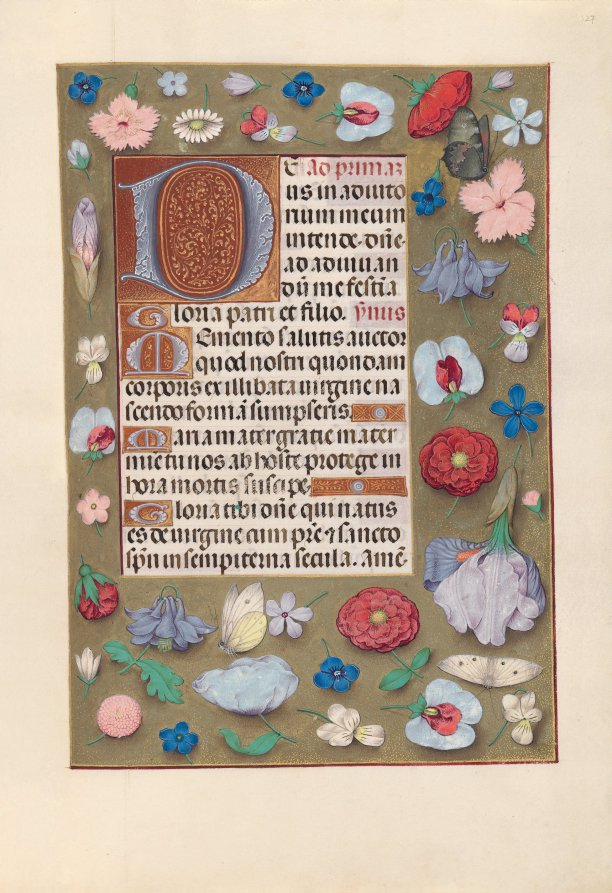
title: Hours of Queen Isabella the Catholic, Queen of Spain: Fol. 127r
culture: Flanders, Ghent and Bruges, late 15th century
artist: Master of the First Prayerbook of Maximillian (Flemish, c. 1444–1519)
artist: and Associates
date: c. 1500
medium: ink, tempera, and gold on vellum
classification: Bound Volume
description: This manuscript was illuminated by a circle of at least five highly organized manuscript painters active in the Flemish cities of Ghent and Bruges. The principal illuminator was Alexander Bening, who painted the majority of the book's miniatures. Manuscripts produced by this circle of artists are renowned for the decoration of their borders, which typically feature a rich variety of realistically-painted flowers, birds, and butterflies. This prayer book, called a book of hours, was intended not for a cleric, but for the private devotions of a lay person-in this case, Isabella the Catholic, Queen of Spain (1451-1504). Isabella's coat of arms embellishes the book's frontispiece. It is unlikely that the book was commissioned by the Queen herself; rather, she probably received it as a diplomatic gift from someone courting her patronage, perhaps Cardinal Francisco Jimenez de Cisneros. A Franciscan friar, Jimenez was dependent upon Isabella for his advancement, first to the post of Queen's confessor in 1492, and then to Archbishop of Toledo in 1495.